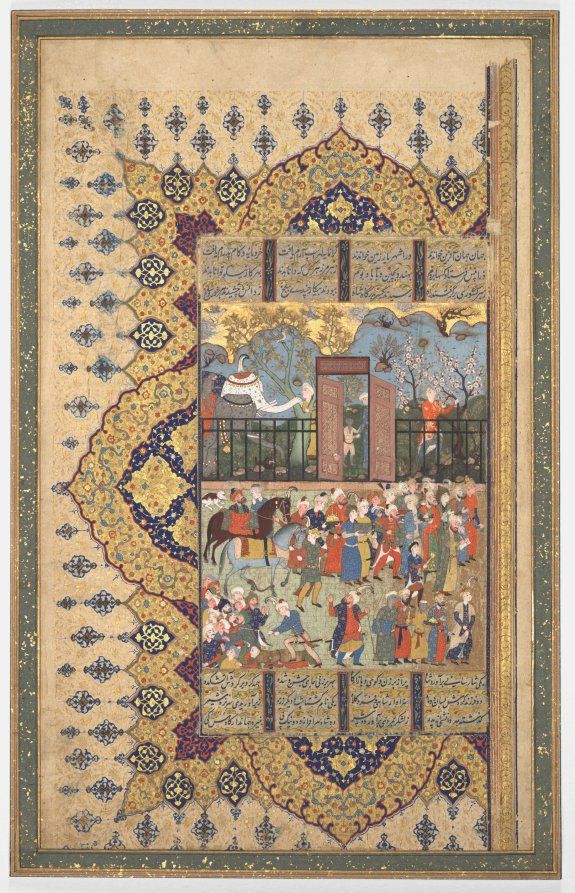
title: King Luhrasp Ascends the Throne: a Processon Arrives at Court, recto of the left folio of a double-page composition from a Shahnama (Book of Kings) of Firdausi (940-1019 or 1025)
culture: Iran, Shiraz, Safavid period (1501-1722)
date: c. 1560–90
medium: opaque watercolor, ink, and gold on paper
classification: Manuscript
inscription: Script: Nasta'liq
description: This scene of a procession arriving at court was surely completed by the court scene itself. The subject of the frontispiece had nothing to do with the text that it accompanied, and the text has not been identified.